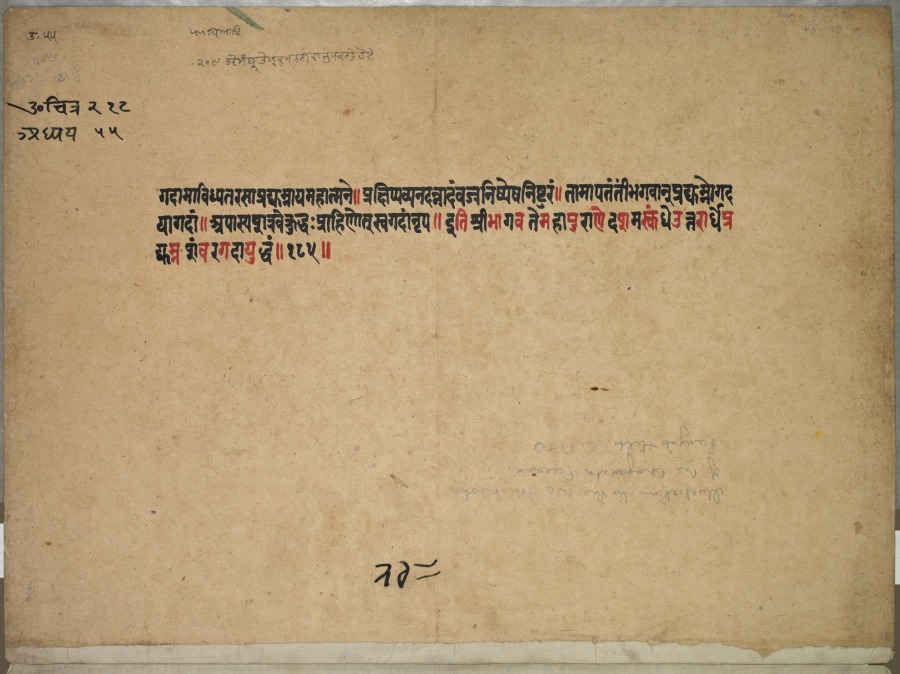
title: Pradyumna and Samvara fight with maces, from the "Large Basohli Bhagavata Purana"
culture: Northern India, Pahari kingdoms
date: c. 1760–65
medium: Gum tempera, ink, and gold on paper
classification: Painting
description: The demon on the left is Samvara. He heard a prophecy that Pradyumna, the son of Krishna and Rukmini, would one day murder him. Hearing this, Samvara kidnapped Pradyumna when he was an infant and threw him into the ocean, where he was swallowed by a fish. The fish was caught and brought to Samvara’s kitchen, where Mayavati discovered him still alive in the belly of the fish. She raised him; he slayed the demon and married Mayavati.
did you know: Pradyumna is the incarnation (avatar) of Kama, the god of erotic love.